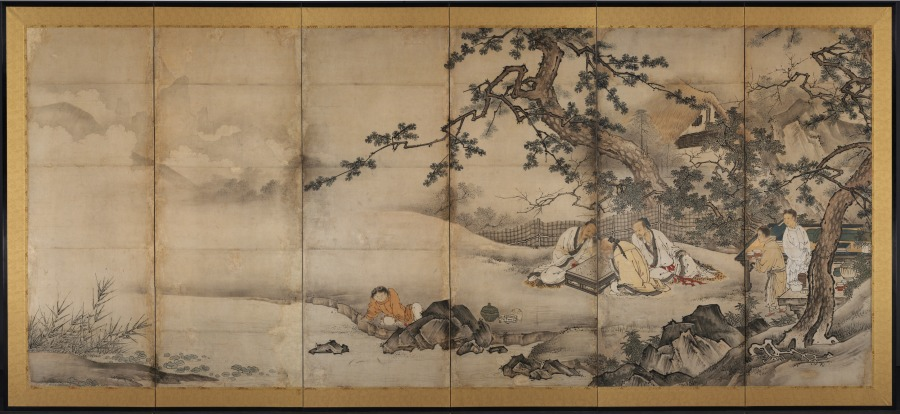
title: The Four Accomplishments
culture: Japan, Momoyama period (1573–1615)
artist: attributed to Kano Shōei (Japanese, 1519–1592)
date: late 1500s–early 1600s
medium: pair of six-panel folding screens; ink and slight color on paper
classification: Painting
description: This pair of screens shows a group of elite Chinese gentlemen and their servants in the countryside. One man is considering his painting in progress, while another looks on as two of his companions play a board game called qi, known in Japan as Go. Nearby is a table set with a selection of books ready to be read and a qin, a type of stringed instrument, still wrapped in its cloth case waiting to be played. The mood is one of enjoyment balanced with formality. Historically, playing the qin and qi along with practicing or admiring calligraphy and painting were considered four skills essential for cultured men in China.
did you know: Another candidate for authorship of these screens is Kano Yukinobu (c. 1513–1575).